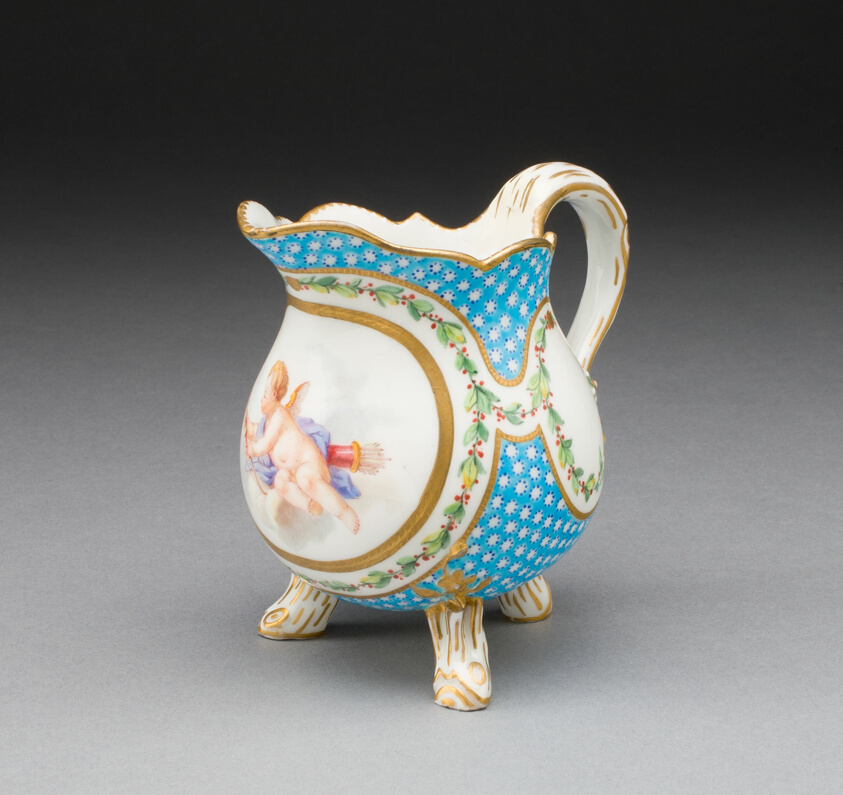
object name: Ceramics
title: Milk Jug (from a tea service)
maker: Sèvres Porcelain Manufactory; French, founded 1740; Figures after François Boucher (French, 1703-1770); Painted by Jacques Fontaine (French, 1734/35-1807, active 1752-1800)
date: 1770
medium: Soft-paste porcelain, polychrome enamels, and gilding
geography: Sèvres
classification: creamer; teaware; tea service; porcelain; european decorative arts; ceramics